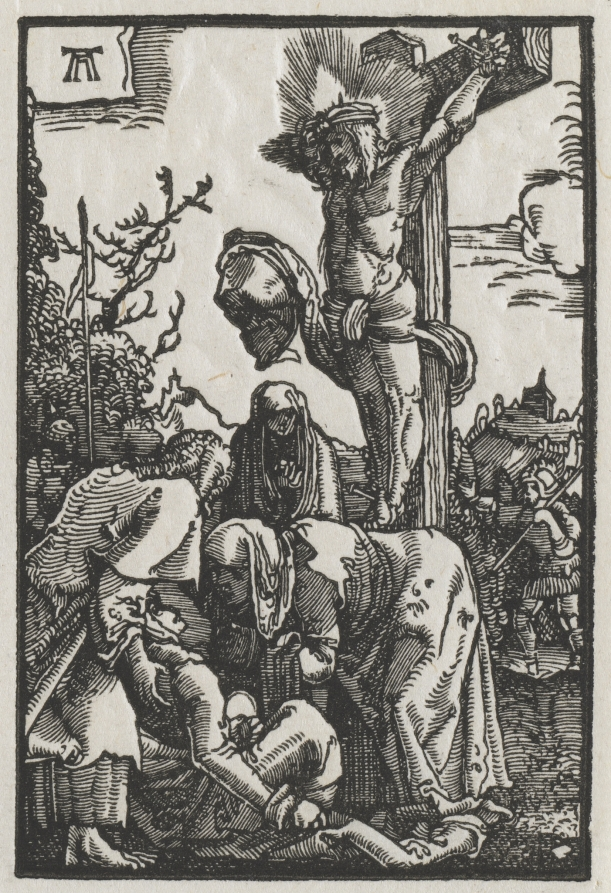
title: The Fall and Redemption of Man: Christ on the Cross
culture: Germany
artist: Albrecht Altdorfer (German, c. 1480–1538)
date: c. 1515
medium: woodcut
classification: Print